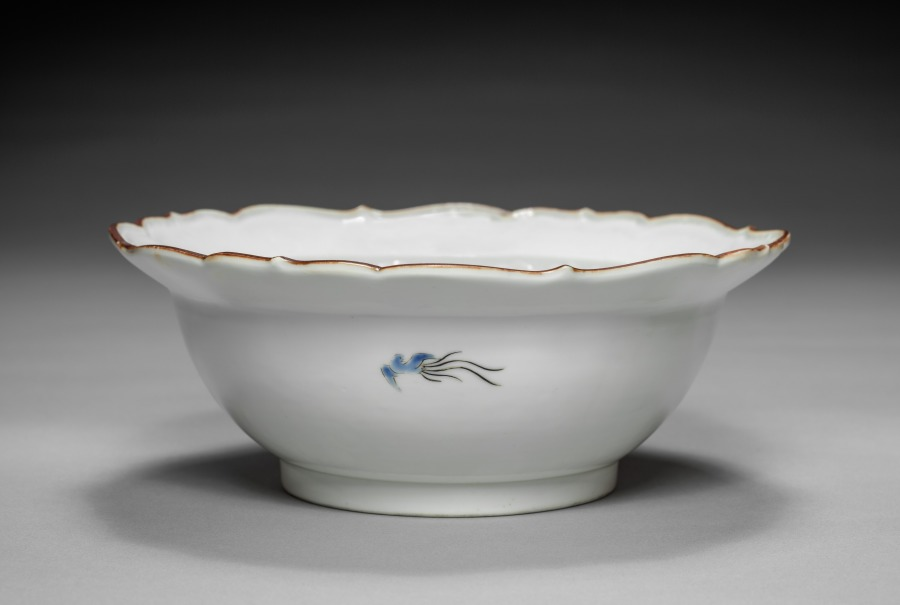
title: Deep Bowl with Dragons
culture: Japan, Edo period (1615–1868)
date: 1700s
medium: porcelain with overglaze color enamel and molding (Hizen ware, Kakiemon type)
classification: Ceramic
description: Graced with energetic dragons amid clouds, this deep bowl has a petal-shaped rim. The coiled position of the dragon in the center and the chasing action of those on the sides contribute to a sense of circular motion. The exterior shows a running figure and two birds in flight, echoing the movement in the interior.